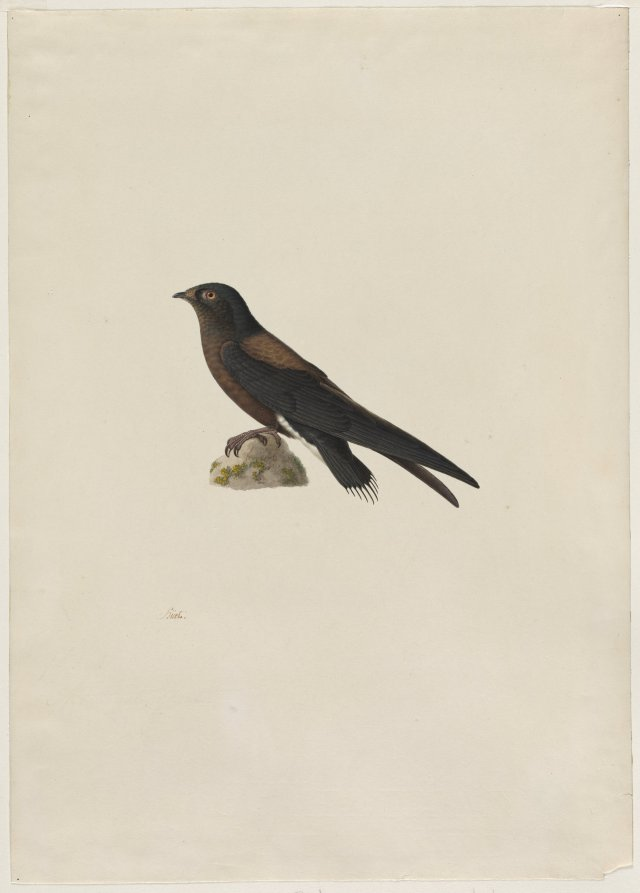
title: Needle-Tailed Swift (Hirundapus caudaculus)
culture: France, 19th century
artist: Paul Hüet (French, 1803–1869)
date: 1800s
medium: watercolor and gouache; framing lines in graphite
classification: Drawing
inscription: signed, lower left, in brown ink: =hüet. ; VERSO, lower left, in black ink: 264 - Martinet géant ; lower left, in graphite: 364?